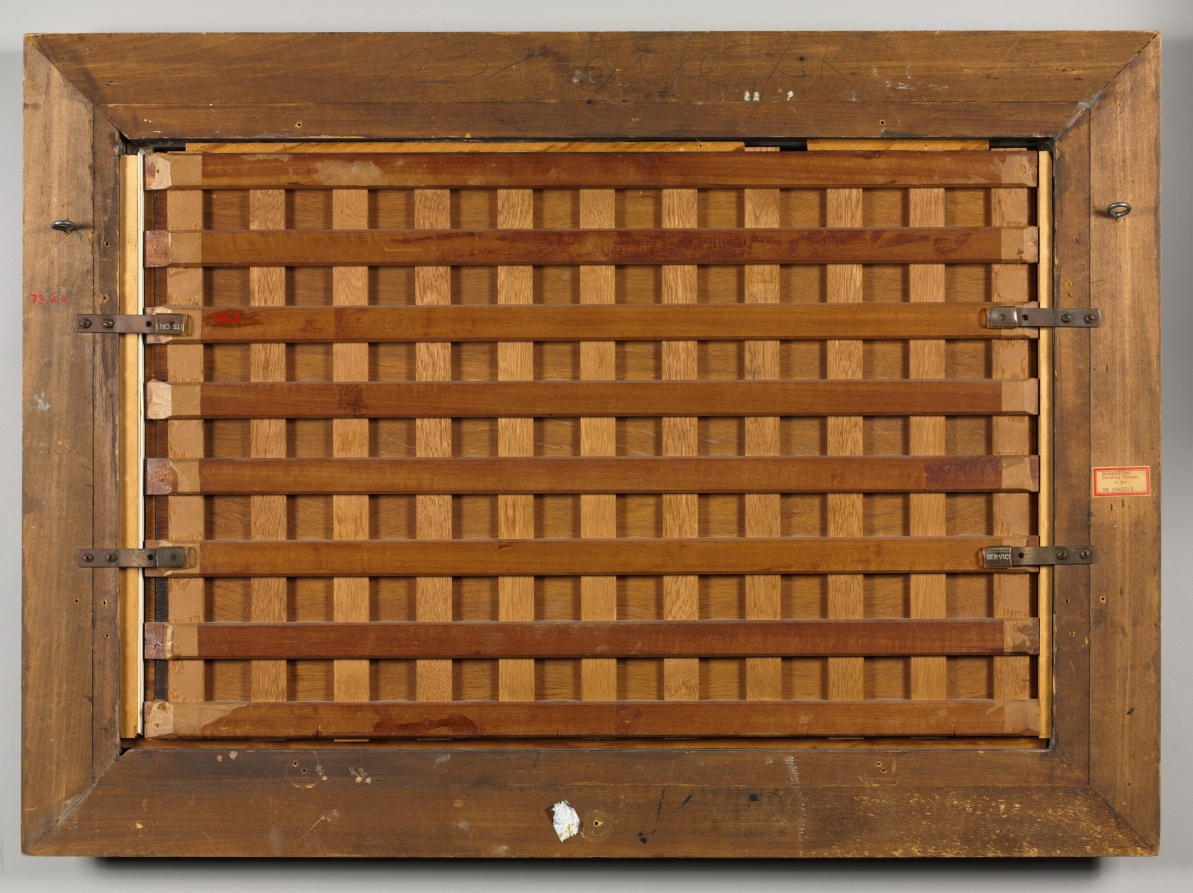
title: Castle on a River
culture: Netherlands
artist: Salomon van Ruysdael (Dutch, 1602–1670)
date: 1644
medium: oil on wood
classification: Painting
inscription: Signed lower left on boat: "S.VR / 1644 (VR in monogram]"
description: Salomon van Ruysdael, the uncle of Jacob van Ruisdael, here represents a free interpretation of the Castle Loevenstein. In addition to its picturesque qualities, the castle had great political and cultural importance as the official state prison and a key fort in the southern Netherlands. Painted just before the Dutch won independence from Spain in 1648, the painting likely expressed nationalist pride for its owner.